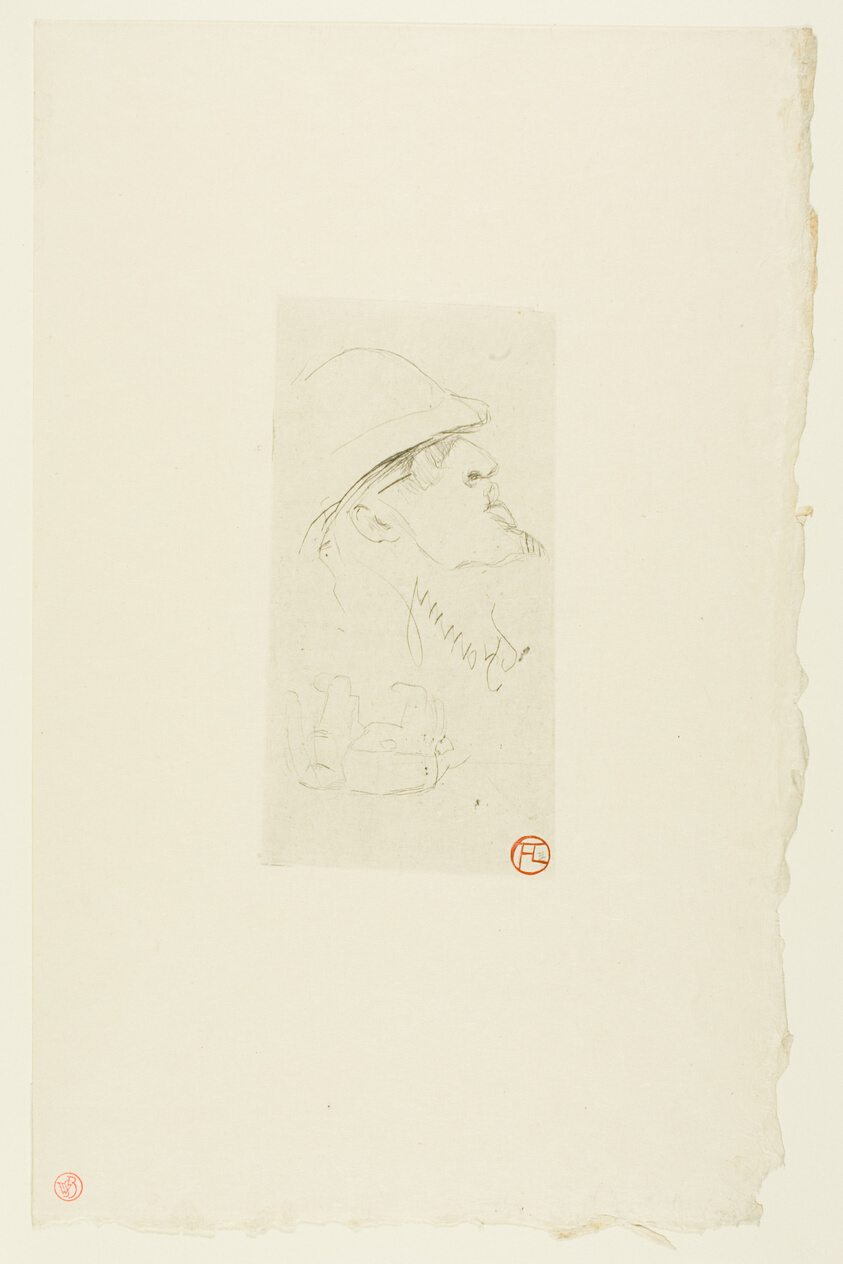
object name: Print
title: The Explorer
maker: Henri de Toulouse-Lautrec (French, 1864-1901)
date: 1898, printed and published 1911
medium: Drypoint from a zinc plate in black on cream laid Japanese paper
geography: France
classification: drypoint; print; prints and drawing